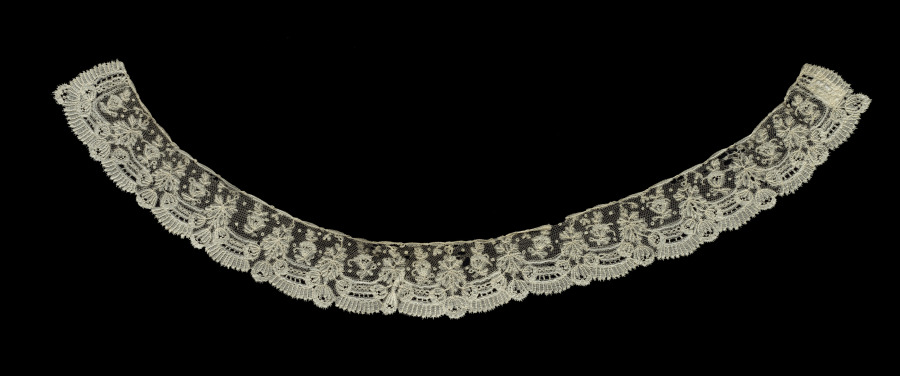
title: Lace Collar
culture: Probably Belgium, Brussels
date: 1800–1820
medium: Bobbin lace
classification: Lace